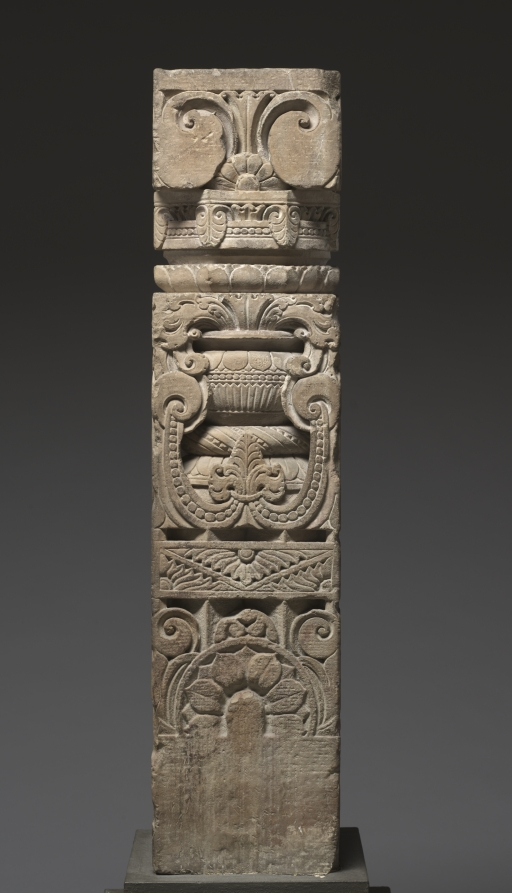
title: Monolithic Pillar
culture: Northern India, Mathura, early medieval period, 7th-8th century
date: 600s–700s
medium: red sandstone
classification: Sculpture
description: The central motif of this temple pillar is a pot, out of which vegetal forms exuberantly emerge, indicating bounty and abundance. The pot itself is decorated with lotus petals, leaves, and a band of pearls. The overflowing pot is a pervasive symbol in India to reference the prosperity and productivity that will result from worship and prayers at the holy site. It also symbolizes the auspiciousness and beauty of the created world.